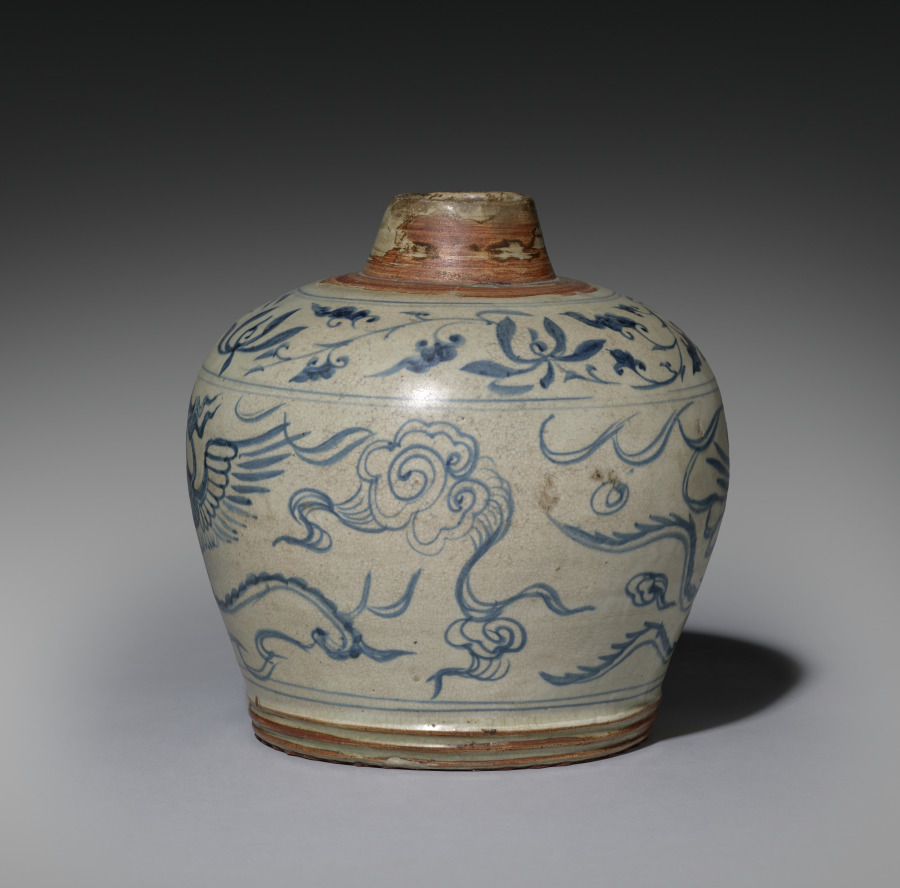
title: Covered Jar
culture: Vietnam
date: 1500s–1600s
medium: stoneware with blue and white decoration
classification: Ceramic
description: This stoneware ginger jar is decorated with a blue and white phoenix among clouds (a symbol of longevity) and floral motifs.